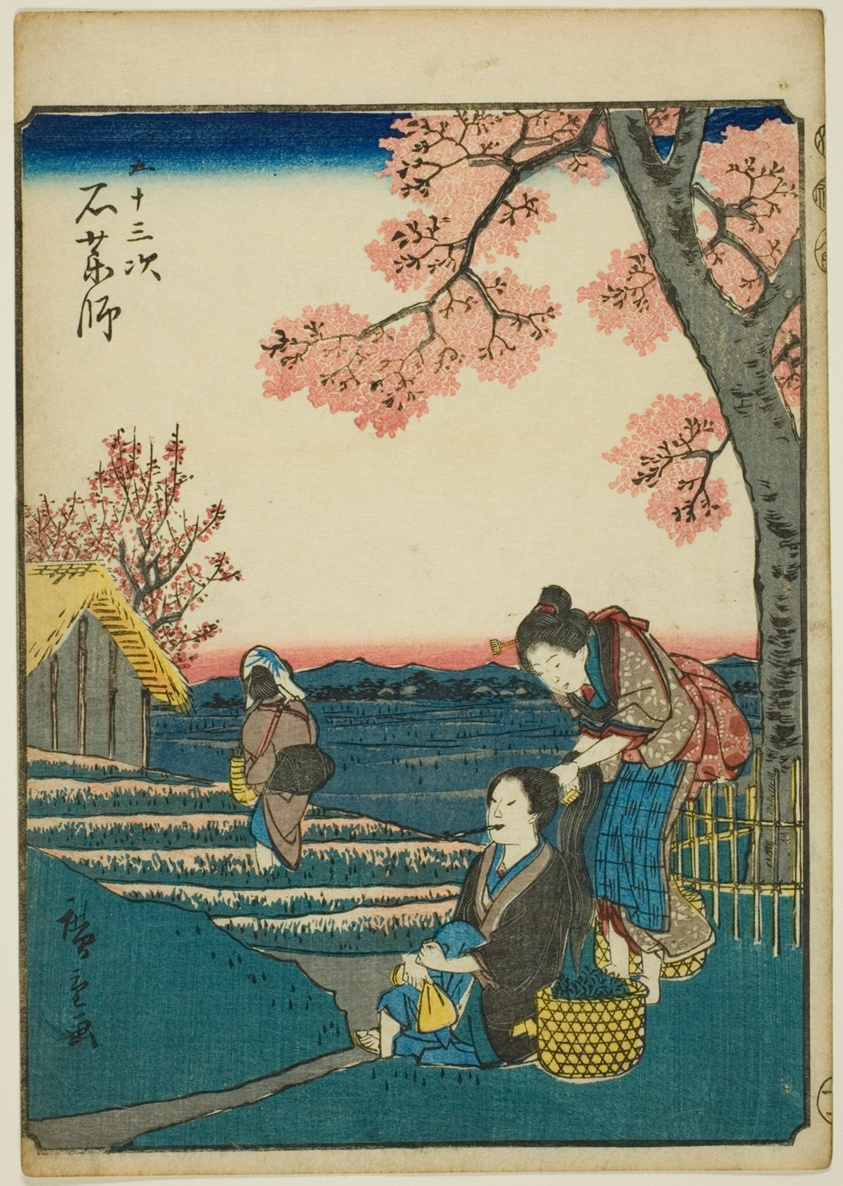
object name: Print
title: Ishiyakushi, from the series "Fifty-three Stations [of the Tokaido] (Gojusan tsugi)," also known as the Figure Tokaido (Jinbutsu Tokaido)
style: Japanese (culture or style)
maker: Utagawa Hiroshige 歌川 広重; Japanese, 1797-1858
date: 1852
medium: Color woodblock print; chuban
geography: Japan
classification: woodblock print; print